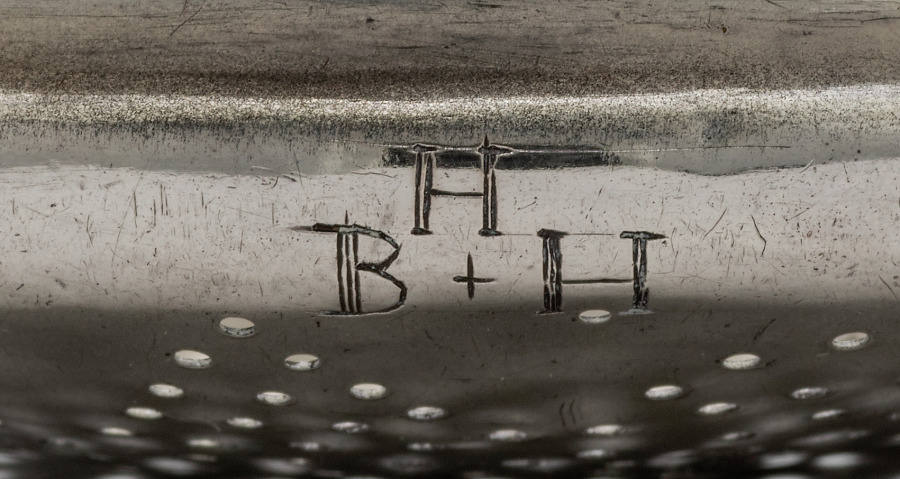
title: Strainer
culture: America, Massachusetts, Boston and Salem, 18th century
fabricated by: Daniel Parker (American, 1726–1785)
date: c. 1765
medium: silver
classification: Silver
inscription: engraved "H" over "B + H" in shaded block letters on side of bowl.